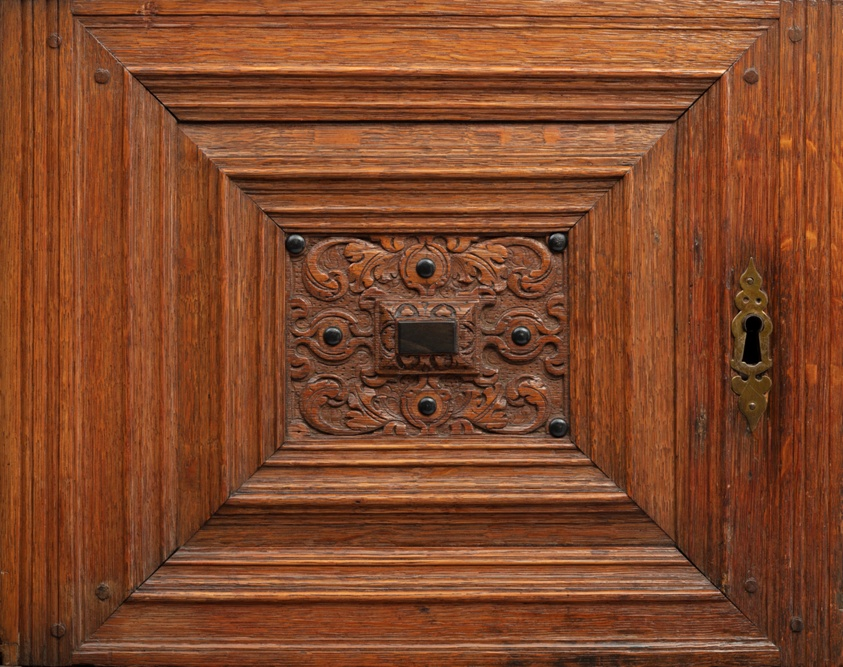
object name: Furniture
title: Linen Cupboard (Kast)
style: Baroque, Mannerism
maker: The Netherlands, probably Amsterdam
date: 1630/50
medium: Oak, pearwood, hardwood, paint, iron, and brass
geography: Netherlands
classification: furniture; decorative arts; functional object; furnishings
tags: lions, animals, architecture